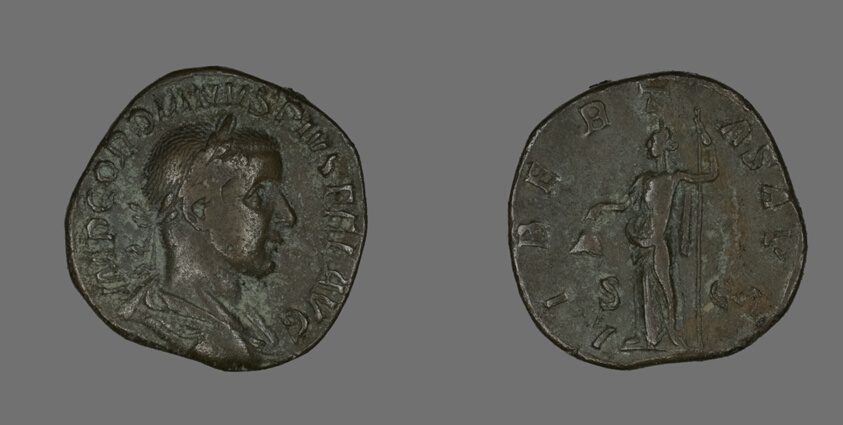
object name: Coin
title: Sestertius (Coin) Portraying Emperor Gordianus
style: roman (ancient, style or period), ancient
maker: Roman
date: 238-244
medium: Bronze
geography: Roman Empire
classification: coin; ancient art